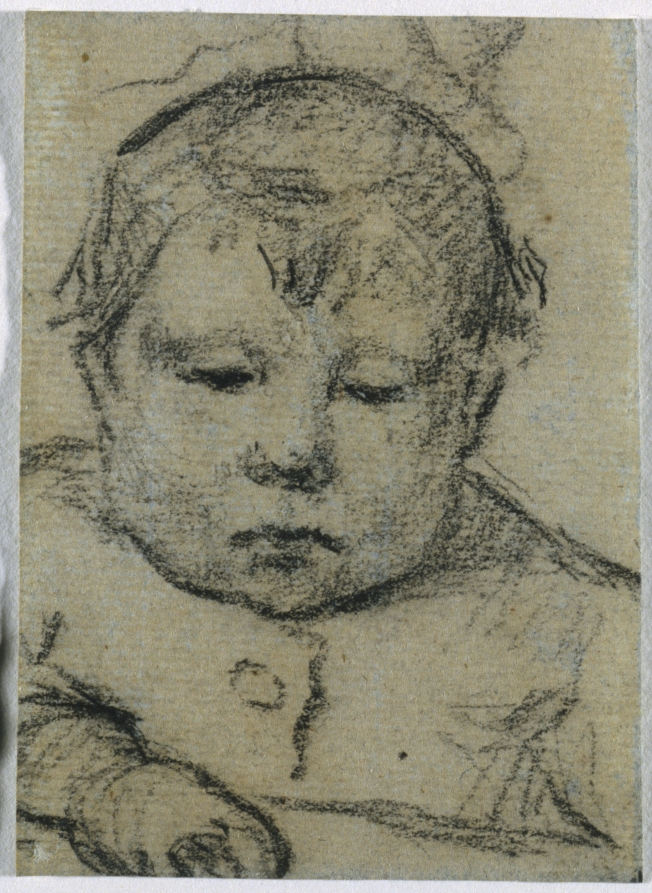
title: Emil Gauguin as a Child, Right Hand Forward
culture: France, 19th century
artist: Paul Gauguin (French, 1848–1903)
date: c. 1875–1876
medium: black crayon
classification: Drawing